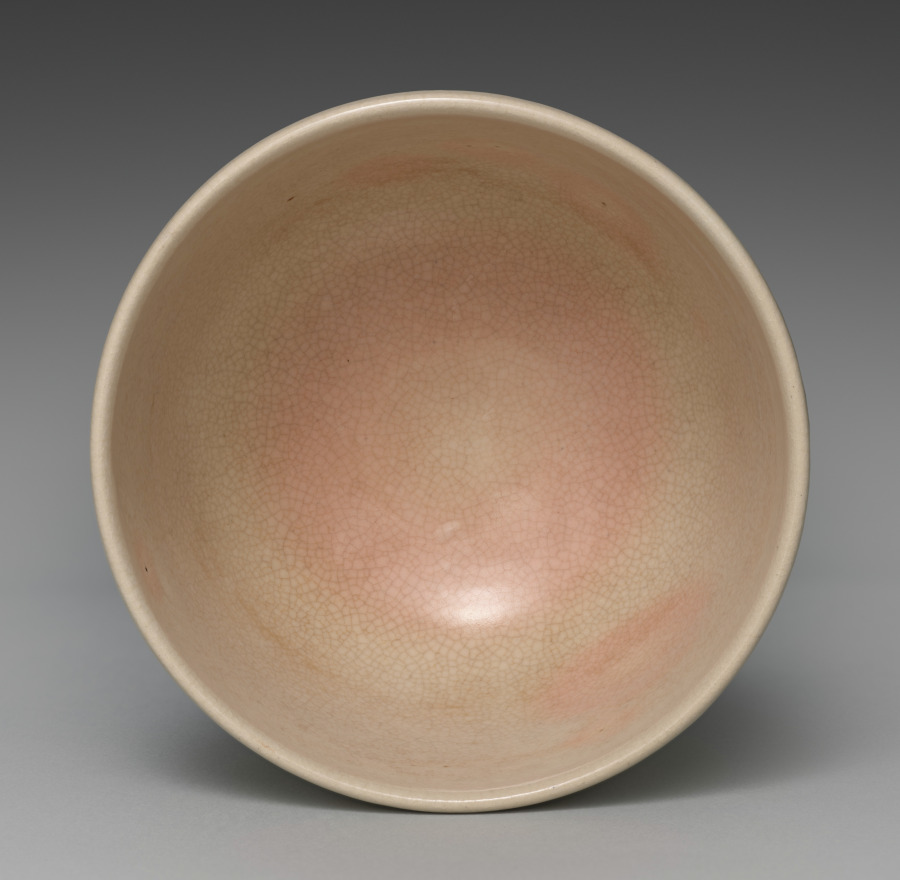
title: Teabowl with Pinks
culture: Japan, Meiji period (1868–1912)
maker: Seifū Yohei III (Japanese, 1851–1914)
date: 1893–1914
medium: Stoneware with crackled glaze and overglaze color enamel and gold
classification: Ceramic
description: This teabowl, for use in chanoyu, is a good example of Yohei III’s mastery of the techniques involved in producing Kyoto ware. The painting of the pinks, with their blue centers, bright red petals, and green leaves, is carefully controlled with crisp gold borders throughout. There is crackling in the transparent glaze and obvious, thick dripping of the milky glaze over the outside of the mouth of the bowl. The pink spots would have appeared in the clay during firing, and the bottom of the inside of the bowl is entirely pink. A triangular wedge has been cut away from the foot, and a gently impressed band rings the bowl beneath the rim.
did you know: The vessel comes with a bespoke brocade pouch with a silk fastening cord, as is customary for Japanese teabowls.